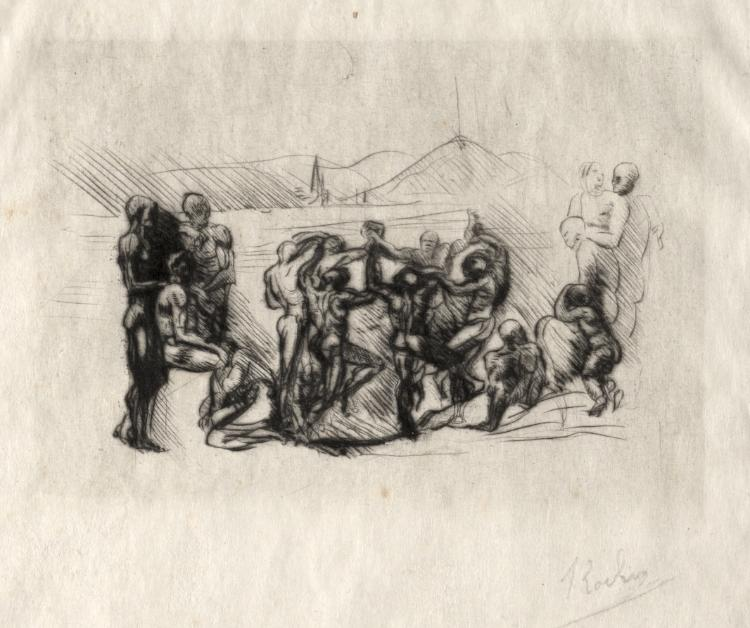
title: La Ronde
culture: France, 19th century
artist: Auguste Rodin (French, 1840–1917)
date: 1883?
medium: drypoint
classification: Print